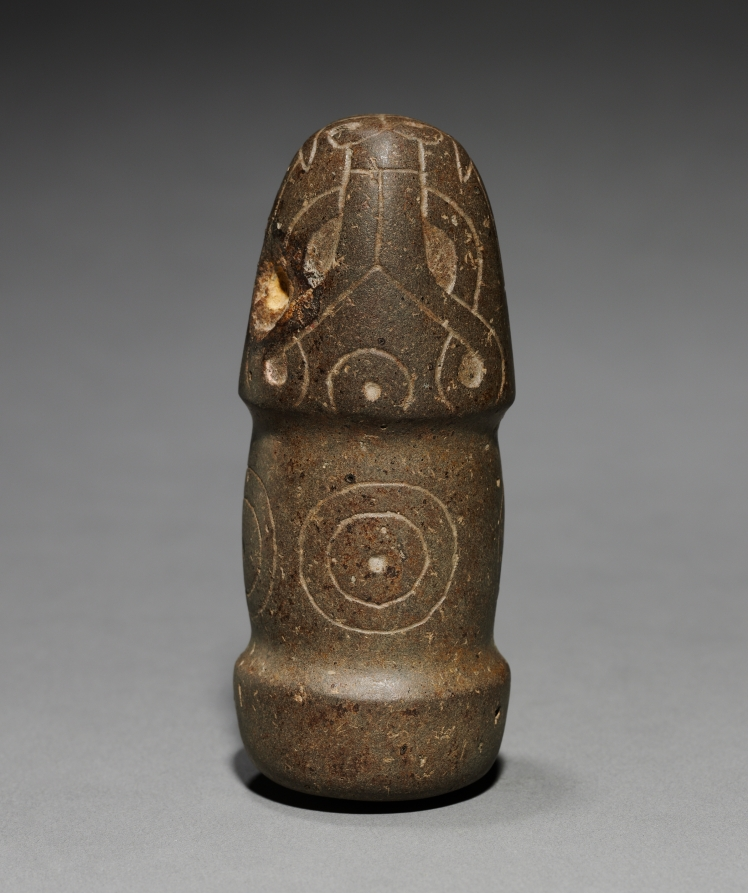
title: Pestle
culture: Peru, North Highlands, Pacopampa(?), Chavín style (900-200 BCE)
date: 700–1 BCE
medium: stone, pigment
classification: Stone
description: Size suggests that this Chavín-style pestle was not used to grind bulky staples like corn, but instead pigments or plant hallucinogens used in religious rites to achieve spiritual insight and communion with cosmic forces. This may come from Pacopampa, a site in the northern highlands where elites adopted Chavín deities and worshiped them alongside local deities. These small sculptures illustrate the appeal and the spread of Chavín religion.